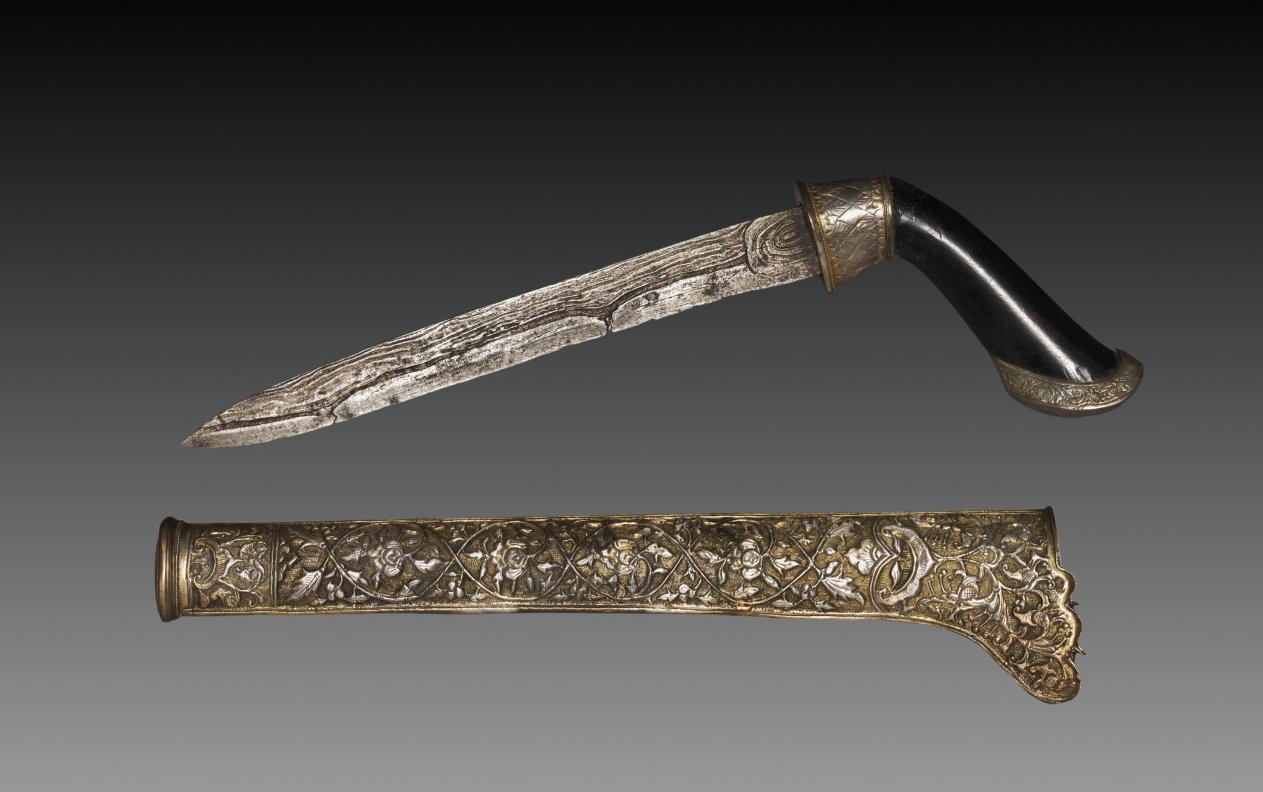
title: Knife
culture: Sumatra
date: 1500s–1800s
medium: Blade: damascened steel; handle: wood, bronze, and gilt silver fittings; scabbard: gilt silver with wood core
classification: Arms and Armor